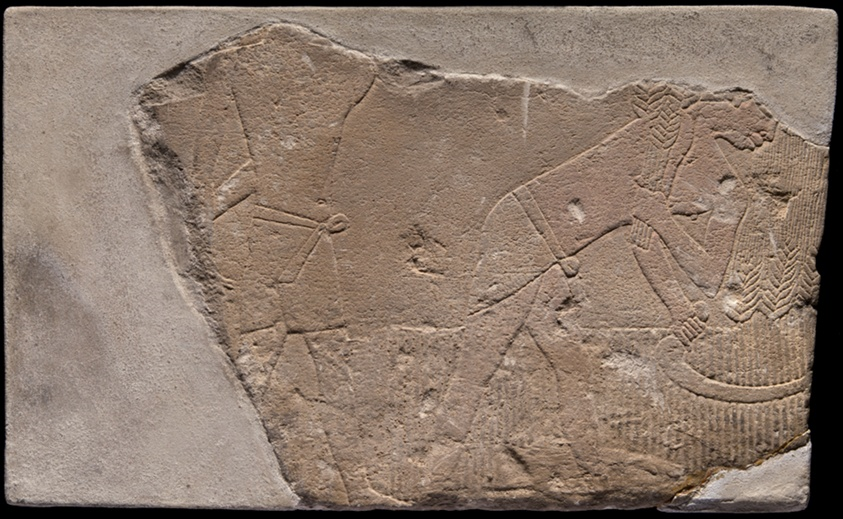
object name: Architectural fragment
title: Wall Fragment from a Tomb Depicting a Harvest Scene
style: tenth dynasty, first intermediate period, egyptian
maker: Egyptian, Saqqara ?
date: First Intermediate Period, Dynasties 9–10 (about 2060–2025 BCE)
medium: Limestone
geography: Egypt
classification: architectural fragment; stone; sculpture; ancient art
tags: agriculture